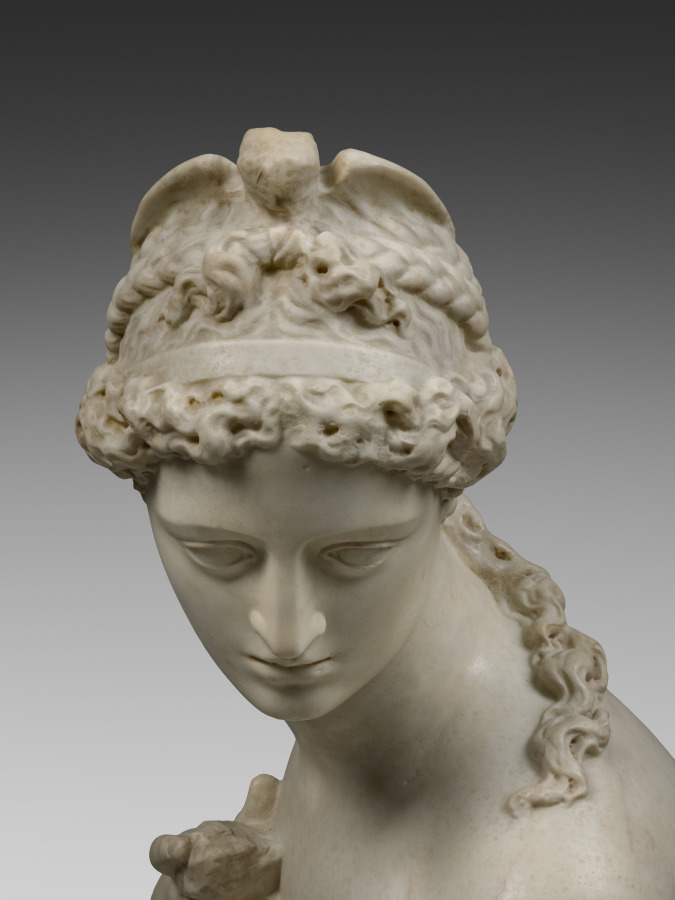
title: Fata Morgana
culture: Italy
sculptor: Giambologna (Flemish, active Italy, 1529–1608)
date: c. 1572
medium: Marble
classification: Sculpture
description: Commissioned by prominent banker Bernardo Vecchietti, whose surname means “old,” Fata Morgana took the name both of the nearby spring that fed the fountain she surmounted, and the legendary fairy who restored King Arthur’s youth. The Fata Morgana is one of only around a dozen sculptures in marble by Giambologna. The artist’s favorite subject was the female nude because of its capacity to showcase his extraordinary ability to model softness in hard stone and to convey dynamic movement. Her twisting pose invites the viewer to appreciate the Fata Morgana from every angle.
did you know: The sculpture originally appeared to emerge mysteriously from a cave within a constructed grotto.